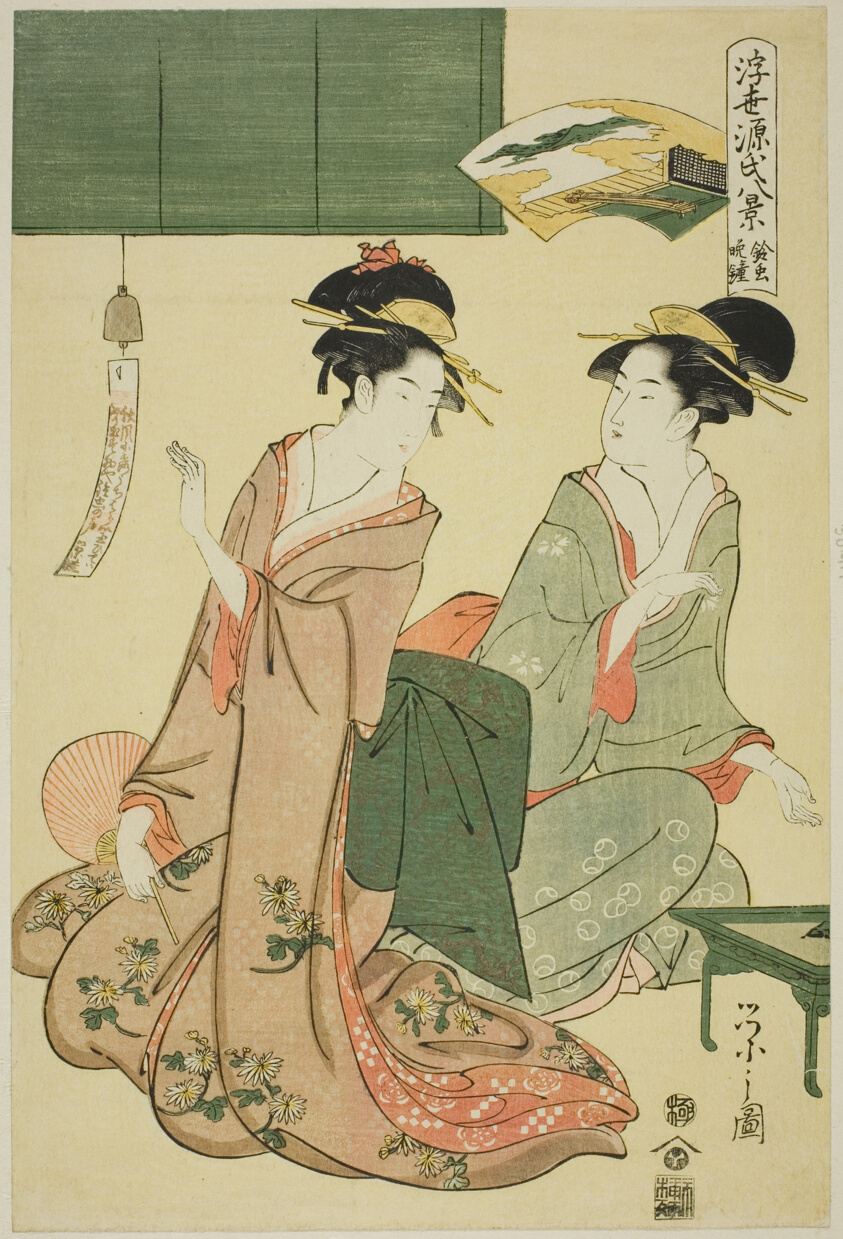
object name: Print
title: Ukiyo Genji hakkei : Suzumushi no bansho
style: Japanese (culture or style)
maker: Chobunsai Eishi; Japanese, 1756-1829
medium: Color woodblock print; oban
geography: Japan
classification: woodblock print; print; asian art